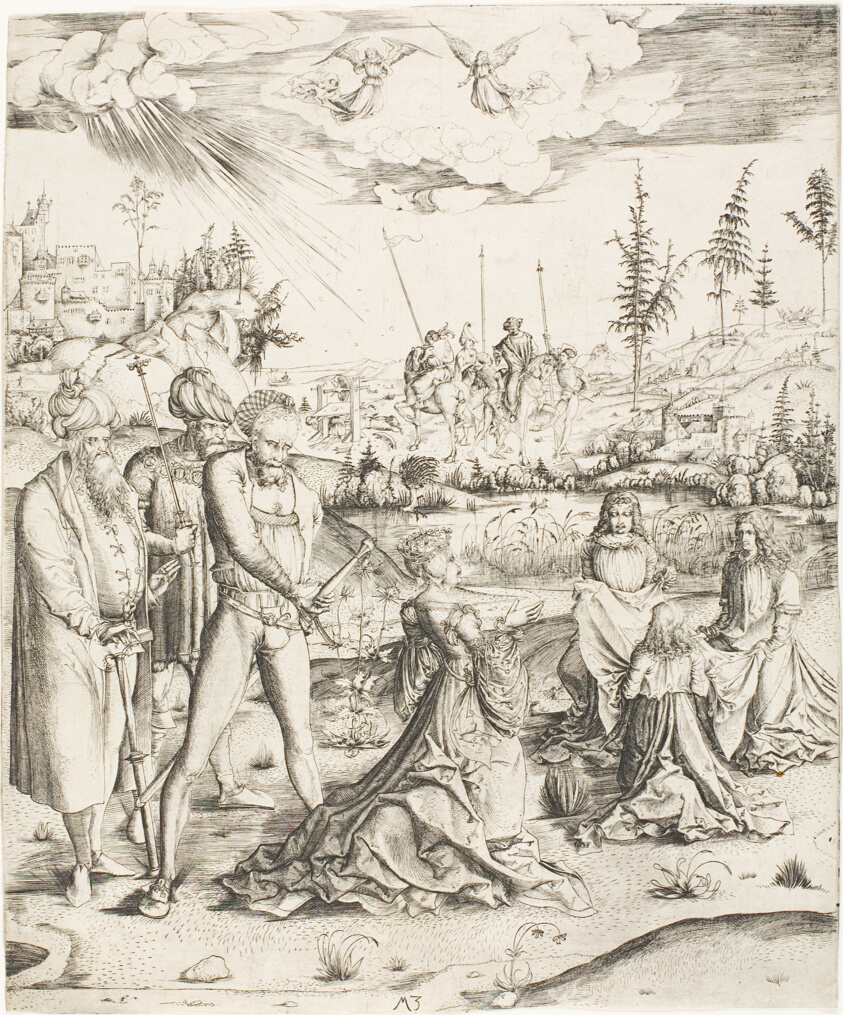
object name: Print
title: The Martyrdom of St. Catherine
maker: Master M.Z.; German, active 1500-1550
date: c. 1500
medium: Engraving in black on ivory laid paper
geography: Germany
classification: engraving; print; prints and drawing